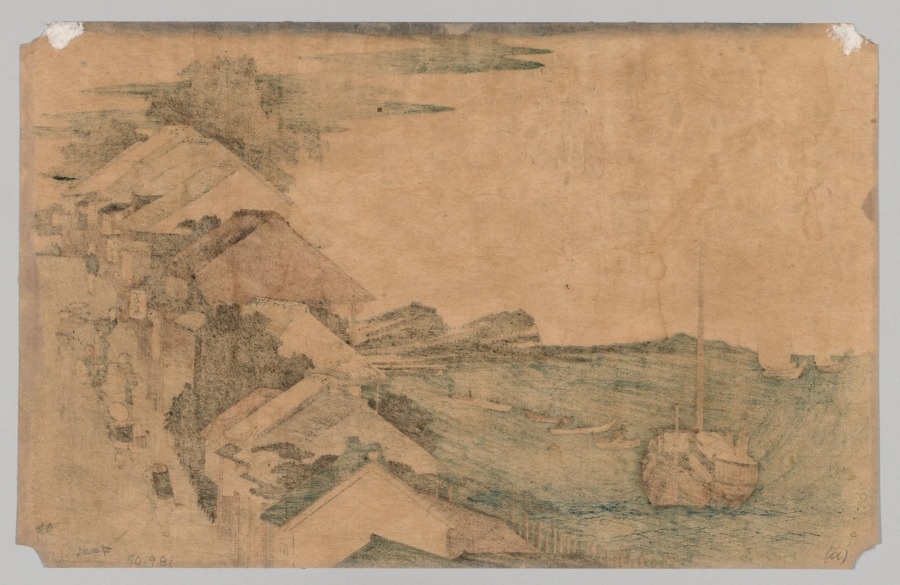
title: Kanagawa, Inland Sea: Top of the Street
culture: Japan, Edo period (1615–1868)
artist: Utagawa Hiroshige (Japanese, 1797–1858)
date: 1797–1858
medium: color woodblock print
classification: Print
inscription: Signature: Hiroshige gwa (two characters signature of middle period) Publisher Seal: Take